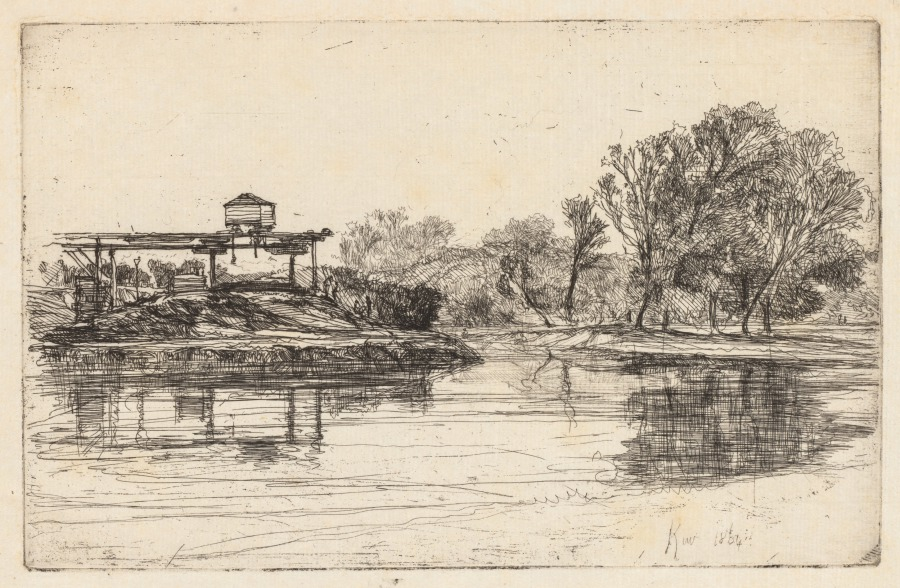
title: Kew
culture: Britain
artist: Francis Seymour Haden (British, 1818–1910)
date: 1864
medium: etching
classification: Print